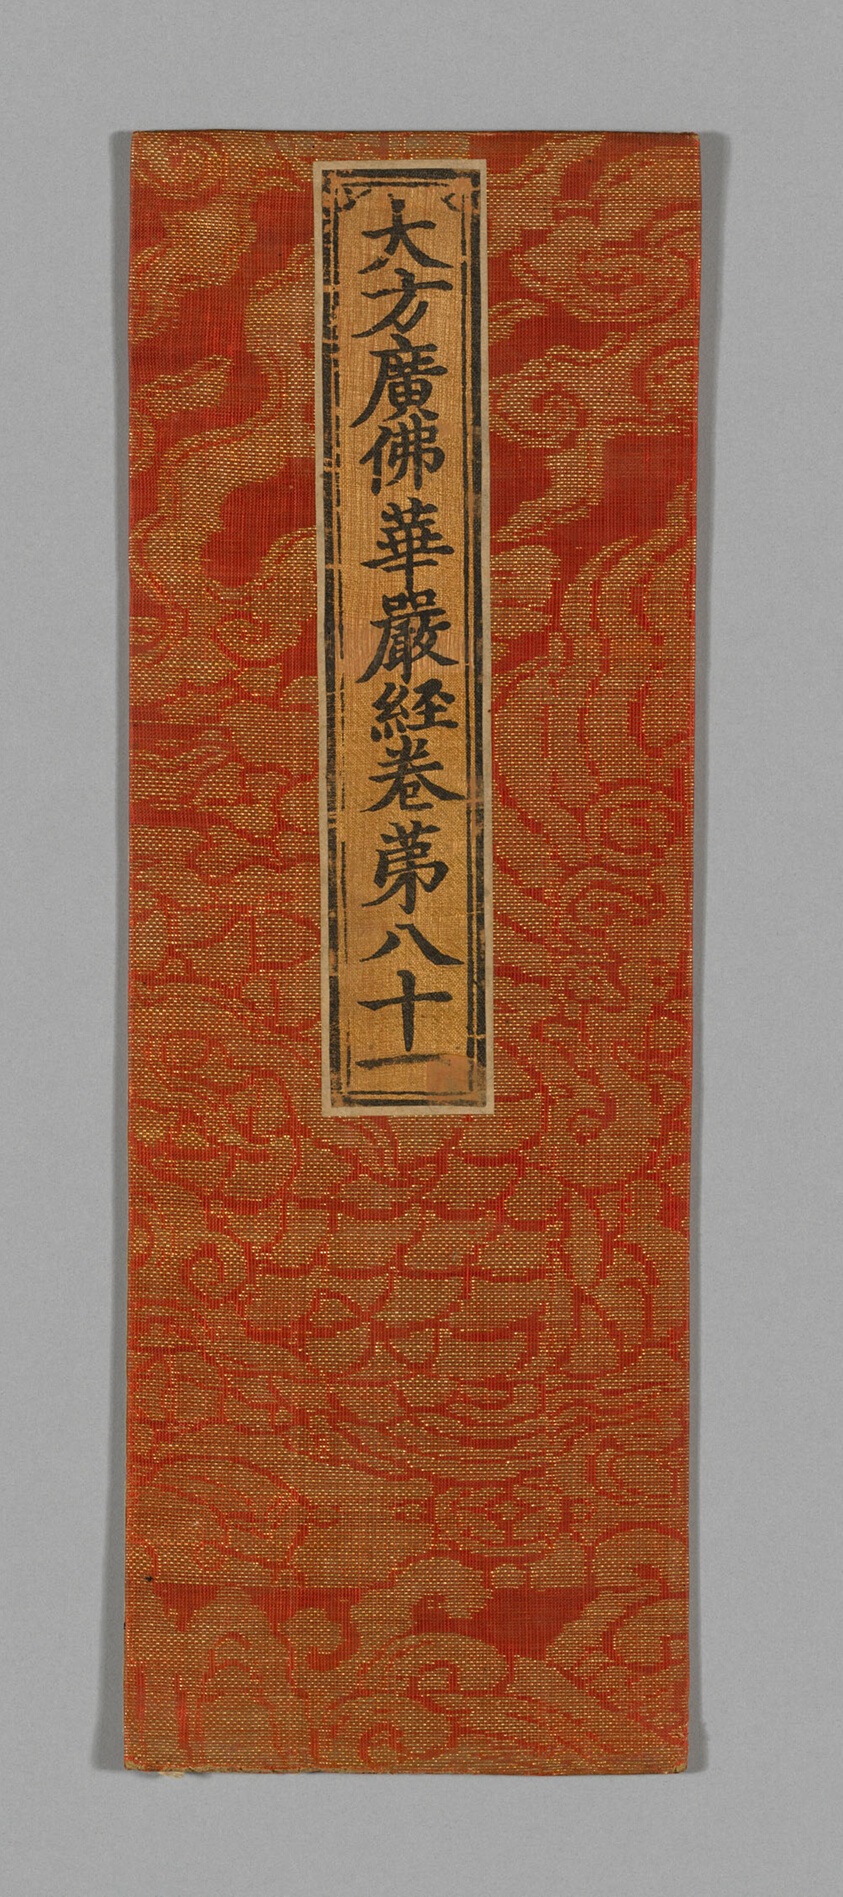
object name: Textile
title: Sutra Cover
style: ming, Chinese (culture or style), East Asian, asian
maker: China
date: Ming dynasty (1368–1644), c. 1590's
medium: Silk and gold-leaf-over-lacquered-paper strips, plain weave with patterning wefts; wrapped over cardboard and partially backed with paper; applied label of silk, plain weave; with inscribed title painted and/or printed with ink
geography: China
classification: textile; weaving